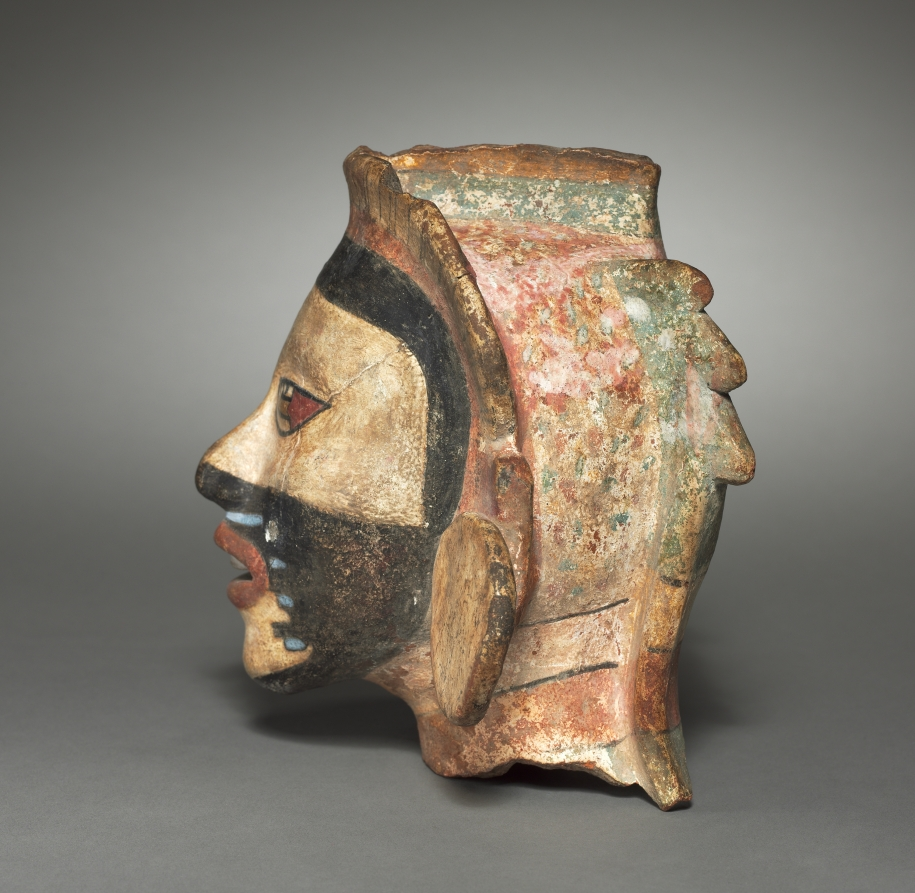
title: Head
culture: Mexico, Classic Veracruz (Totonac or Tajin)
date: 600–1100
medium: pottery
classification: Sculpture